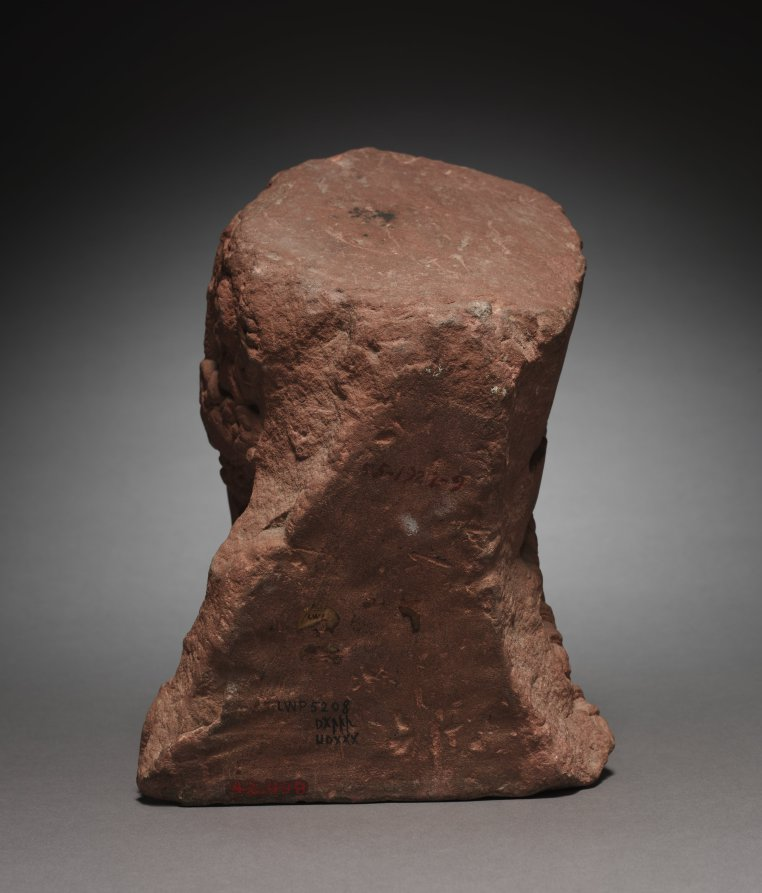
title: Head of Vishnu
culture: Northern India, Uttar Pradesh, Mathura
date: 400s CE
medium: sandstone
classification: Sculpture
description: During this period in India, the Hindu god Vishnu wears a distinctive squarish crown with a central medallion featuring a lion head. With strings of pearls issuing from his mouth, the imagery conveys the idea of radiance and glory. Devotees recognized Vishnu as having solar and royal attributes. His coiled ringlets of hair and heavy earrings also indicate that he was meant to have the appearance of a royal warrior.